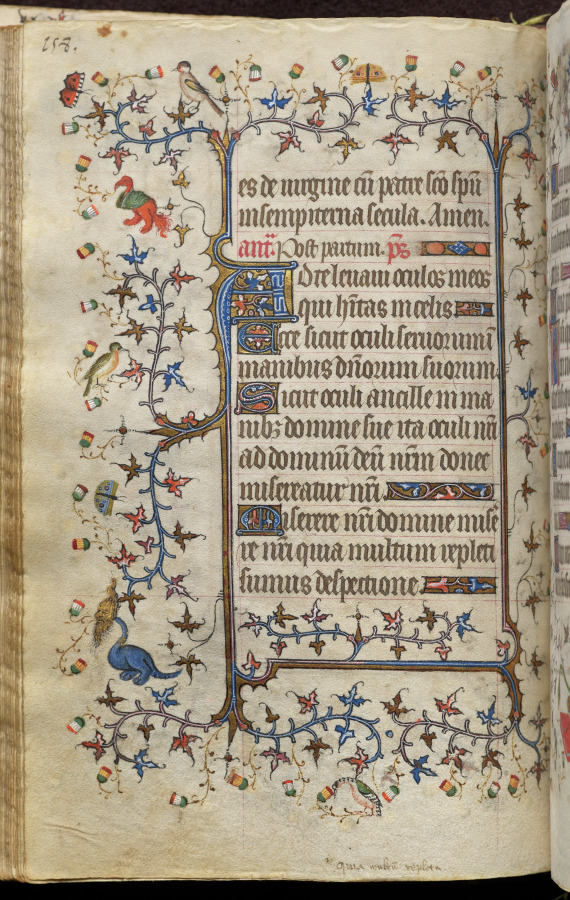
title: Hours of Charles the Noble, King of Navarre (1361-1425): fol. 79v, Text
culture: France, Paris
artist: Master of the Brussels Initials and Associates (French)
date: c. 1405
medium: ink, tempera, and gold on vellum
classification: Bound Volume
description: This precious volume was obviously highly prized by its owner, the French-born King of Navarre, who had his coat of arms painted on no less than twenty folios. Rather than directly commissioning this manuscript from a specific workshop, it seems that Charles the Noble acquired his book of hours -- perhaps ready-made for the luxury market -- while on a trip to Paris in 1404-05. A collaborative effort, six painting styles are evidenced within the pages of this codex, those of two Italians, two Frenchmen, and two Netherlanders. The painter who was responsible for the planning and decoration of the book, and who produced seventeen of the large miniatures, was a Bolognese artist known as the Master of the Brussels Initials. His principal assistant, responsible for most of the borders, was a Florentine who signed his name "Zecho" da Firenze on folio 208 verso.